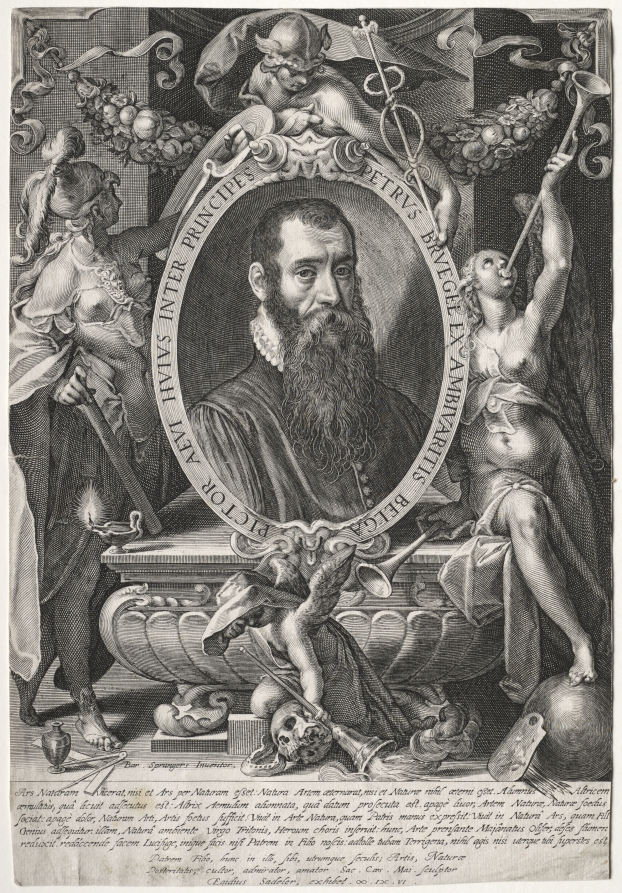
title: Peter Bruegel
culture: Flanders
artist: Aegidius Sadeler (Flemish, c. 1570–1629)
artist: after Bartholomaeus Spranger (Flemish, 1546–1611)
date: 1606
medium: engraving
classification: Print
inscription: around portrait, in plate: PETRVS BRVEGEL EX AMBIVARITIS BELGA PICTOR AEVI HVIVS INTER PRINCIPES ; lower left, in plate: Bar. Sprangers Inventor. ; across bottom, in plate: Ars Naturam vicerat, nisi et Ars per Naturam esset: Natura Artem æternarat, nisi et Naturæ nihil æterni esset. Alumnus Altricem / æmulatus, quâ licuit adsecutus est: Altrix Aemulum alumnata, quâ datum prosecuta est. apagè liuor, Artem Naturæ, Naturæ foedus / sociat: apagè dolor, Naturam Arti, artis foetus sufficit. Viuit in Arte Natura, quam Patris manus expressit: Viuit in Naturâ Arts, quam Fili / Genius adsequitur. illam, Naturâ ambiente Virgo Tritonis, Heroum choris inseruit: hunc, Arte prensante Majânatus Olifer, deses flumen / redixit. redáccende facem Lucifuge, inique facis nisi Patrem in Filio noscis: adtolle tubam Terrigena, nihil agis nisi uterque tibi ßuperstes est / Patrem Filio, humc in illo, sibi utrumque seculis; Artis, Naturæ / Posteritatis, cultor, admirator, amator Sac. Cæs. Mai. sculptor / Egidius Sadeler, exhibet. [infinity symbol] . IC[reversed]C . VI .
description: Around 1600, three decades after the death of artist Pieter Bruegel (about 1525-1569), a renewed interest in his work sparked the so-called Bruegel Renaissance. Admired for his scenes of everyday life and his realistic landscapes, he was highly praised for faithfully following nature. Appropriately, the inscription on Sadeler's print is a lengthy discussion about the imitation of nature, a matter of great interest to artists at the time. Bruegel is surrounded by Minerva and Mercury (who here personify Art and Eloquence, respectively) and a composite figure of Fortune and Fame. The cherub bearing the skull and torch at bottom is probably Thanatos, a classical symbol of death. He bows to mourn the artist, but as the still-flaming torch indicates, Bruegel's genius and fame are immortal.